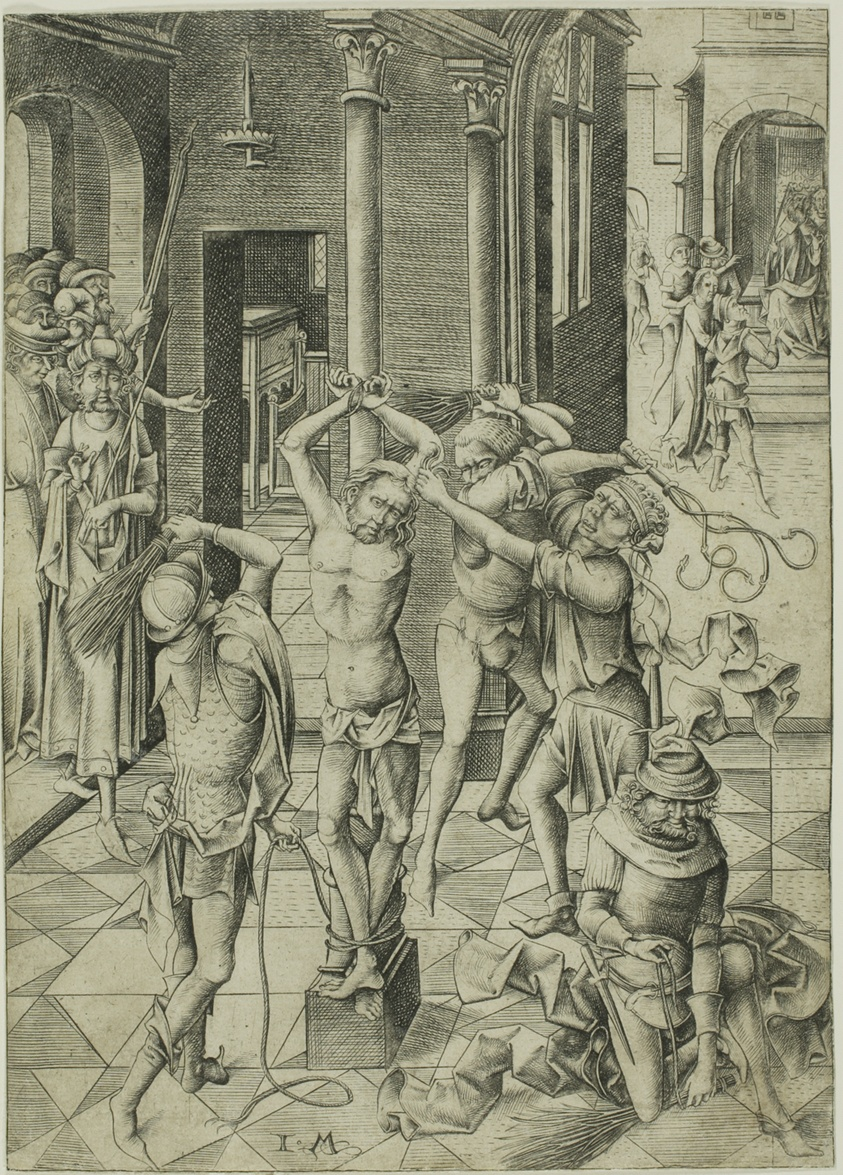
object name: Print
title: The Flagellation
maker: Israhel van Meckenem, the younger (German, c. 1440/45-1503)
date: 1465/1503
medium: Engraving in black on cream laid paper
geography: Germany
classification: engraving; print; prints and drawing